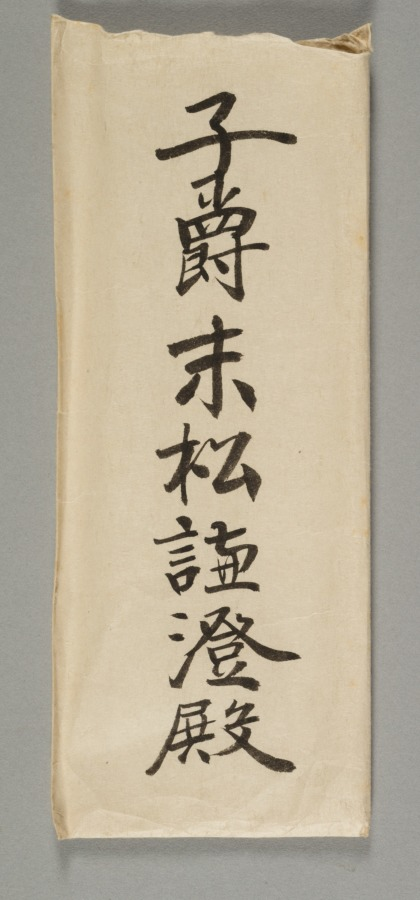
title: Fujiwara no Muchimaro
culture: Japan, Kamakura period (1185–1333)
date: 1200s or 1300s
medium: Hanging scroll; ink, color, gold, and cut gold on silk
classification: Painting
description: This portrait of Fujiwara no Muchimaro (680–737), a grandson of Fujiwara no Kamatari (614–669), includes an image of Buddha Dainichi Nyorai above his head. By situating the image of Dainichi there, this painting would seem to assert that Muchimaro is an avatar of Dainichi. In the same way that kami could be identified with Buddhist counterparts, powerful humans could also be seen as manifestations of Buddhist deities. A similar painting is at Eizanji in Nara, of which Muchimaro is known as the founder. It was once a branch temple of Kōfukuji, the Fujiwara family temple.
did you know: The boughs of wisteria appearing in the background symbolize the figure's status as a Fujiwara family member.